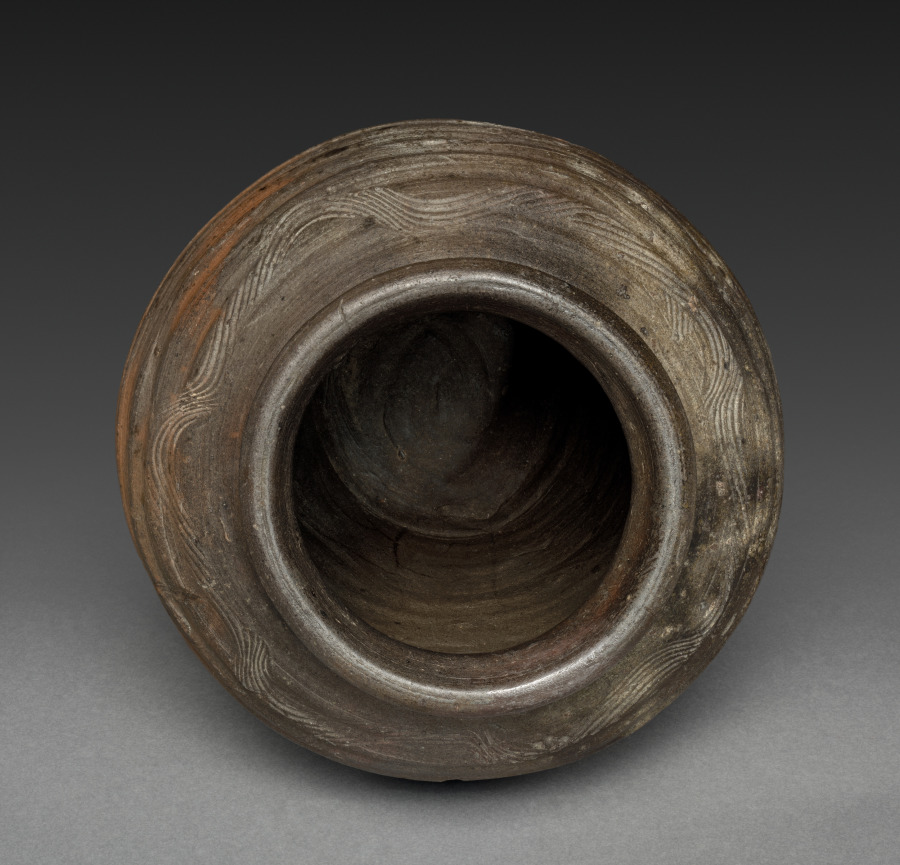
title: Storage Jar: Bizen Ware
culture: Japan, Muromachi period (1392–1573)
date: late 1400s-early 1500s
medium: stoneware with natural ash glaze, incised comb pattern, and incised potter's mark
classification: Ceramic